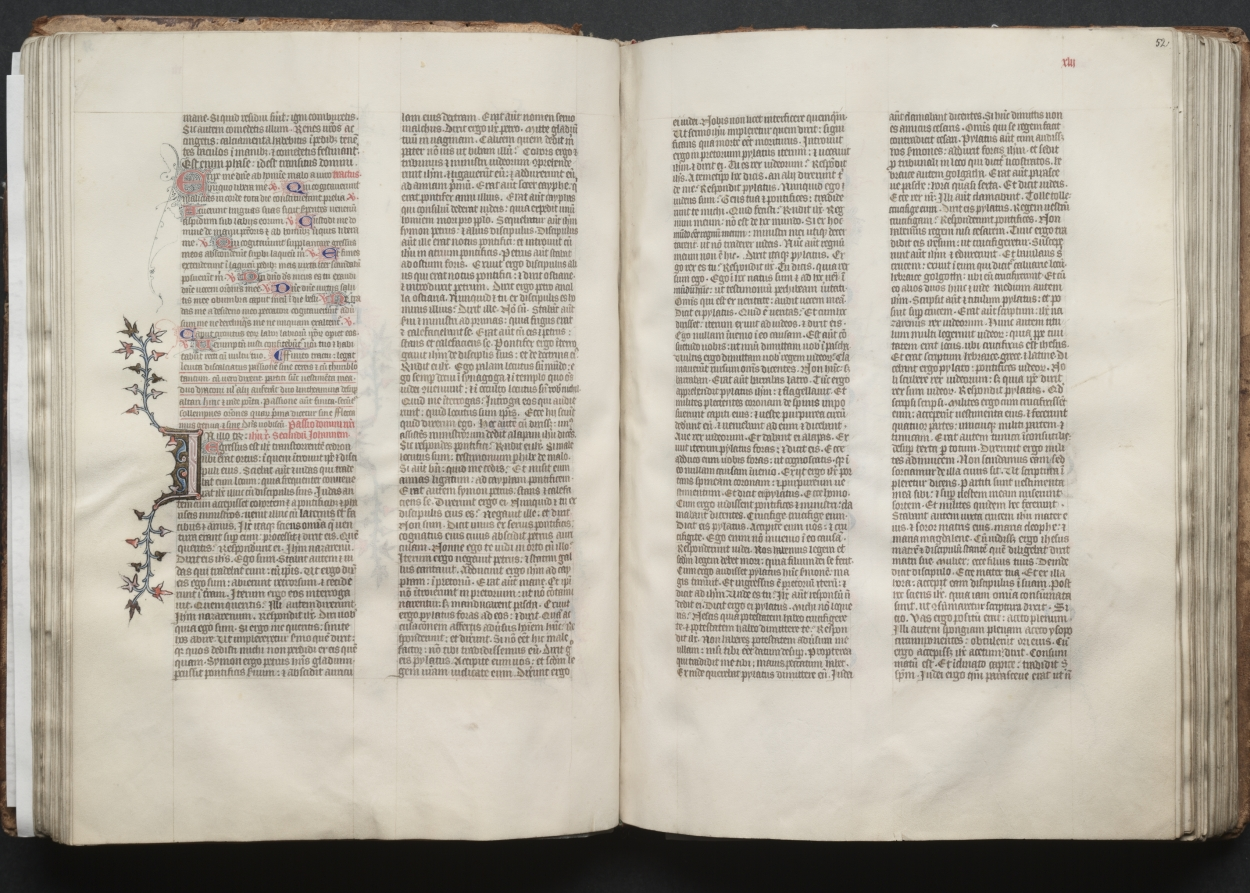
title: The Gotha Missal: Fol. 52r, Text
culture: France, Paris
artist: Master of the Boqueteaux (French)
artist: and Workshop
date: c. 1375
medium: ink, tempera, and gold on vellum; blind-tooled leather binding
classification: Bound Volume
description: The style and quality of this manuscript's decoration is typical of deluxe Parisian books made for aristocratic or royal patrons. Most of the book's decoration appears to be the work of the Master of the Boqueteaux, an artist active at the court of King Charles V (died 1380). His style was apparently shared by a number of book illuminators working in and around Paris. It is very possible that the Gotha Missal belonged to Charles V, but is not provable because the manuscript has no royal portraits and lacks a colophon. Given the book's magnificent decoration, however, it would seem that it was produced for a Valois prince, if not for the king himself. The manuscript receives its name from the German dukes of Gotha, its later owners.